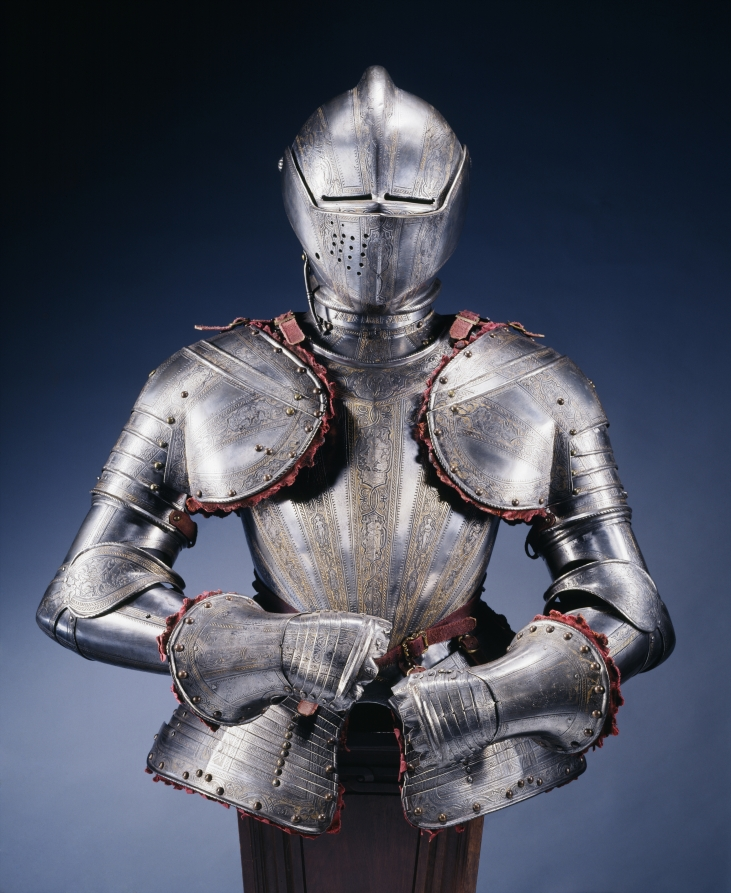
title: Half Armor for the Foot Tournament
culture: Italy, Milan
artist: Pompeo della Cesa (Italian, active 1572–93)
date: c. 1590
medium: etched and gilded steel, brass rivets, leather and velvet fittings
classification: Arms and Armor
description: This armor was designed for the foot tournament, an event that was separate from the equestrian jousts popularized during the Middle Ages and still favored among Renaissance aristocracies throughout Europe. Foot tournaments were commonly fought over a barrier that separated the combatants and gave protection to their legs, so a half-armor such as this one provided sufficient protection. The original owner of this suit would have worn it with colorful puffed and slashed britches and hose. The use of outlandish accessories, such as a large ostrich feather plume (a brass plume holder may be seen on the back of the helmet) and red velvet pickadils between the steel plates, provided additional splendor.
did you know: Pompeo della Cesa was the Armani or Gucci of the 1500s; everyone wanted to wear him.